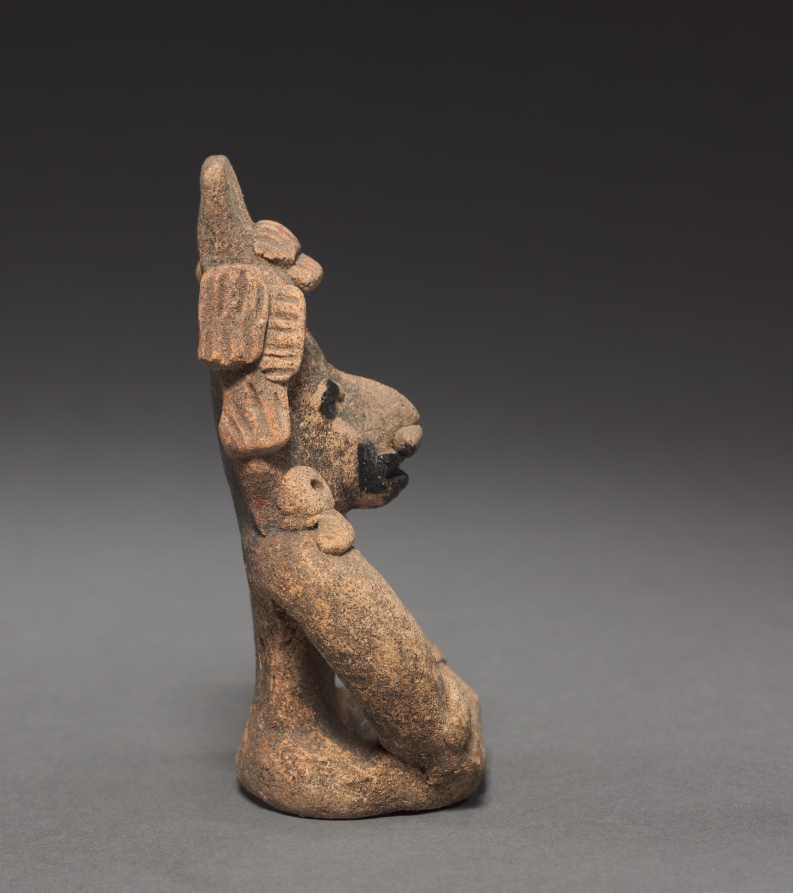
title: Seated Figurine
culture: Mexico, Veracruz, Remojadas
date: c. 150–1 BCE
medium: earthenware with asphalt paint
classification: Sculpture